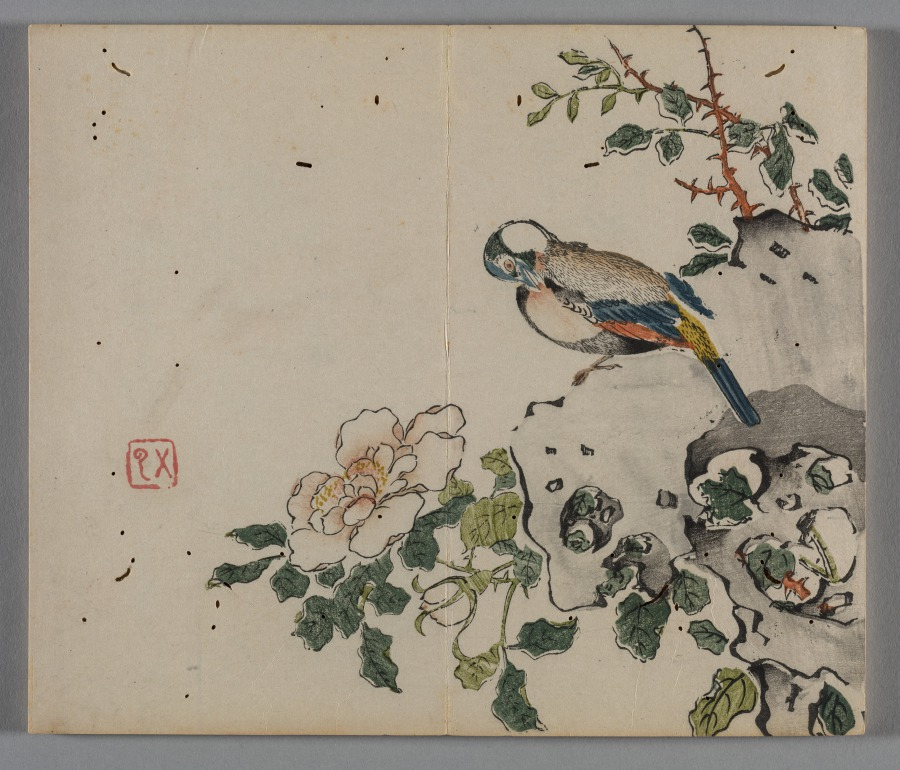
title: Ten Bamboo Studio Painting and Calligraphy Handbook (Shizhuzhai shuhua pu): Birds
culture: China, Qing dynasty (1644-1911)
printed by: Hu Zhengyan (Chinese, c. 1584–1674)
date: 1633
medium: Woodblock-printed book; ink and colors on paper; first edition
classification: Print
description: Color printing reached a level of perfection in the early 1600s, as seen in this Ten Bamboo Studio Collection of Calligraphy and Painting and the Mustard Seed Garden Manual of Painting (printed 1679 and 1701). The painterly quality, precision in registering (aligning) the woodblocks, and harmonious colors made them the most successful color print editions in Chinese history. Both editions were printed and compiled in Nanjing, spread nationwide, and had a great impact on the arts in Japan and Korea.